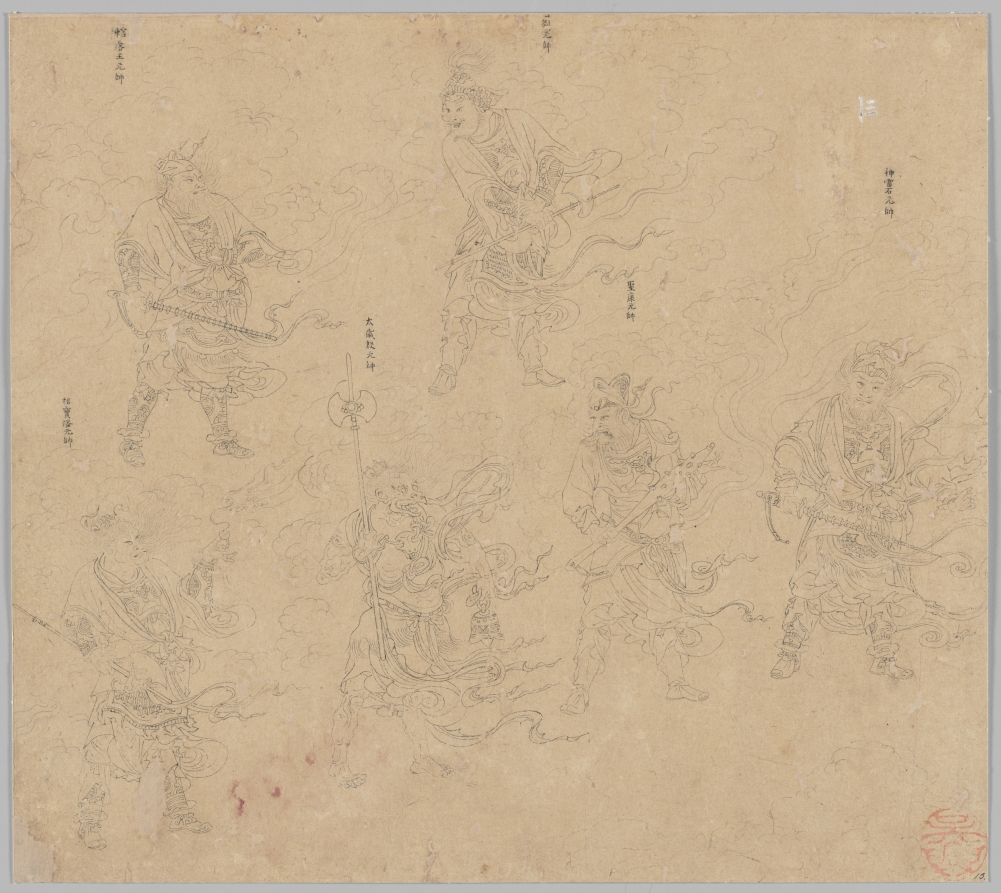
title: Album of Daoist and Buddhist Themes: Procession of Daoist Deities: Leaf 13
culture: China, Southern Song dynasty (1127-1279)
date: 1200s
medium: Album, ink on paper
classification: Painting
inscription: 神雷石元帥; 聖康元帥; 洞神劉元帥 (partially obscured); 太歲殷元帥; 豁落王元帥; 招寶潘元帥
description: These six martial figures are Field Marshals in the Daoist pantheon. In the lower row from left to right are Field Marshals Pan 潘元帥, Yin Jiao 殷郊, Kang Xi 康席, and Shi Shenyu石神毓. Wang E 王惡, and Liu 劉元帥, whose label has been damaged, are in the upper row.